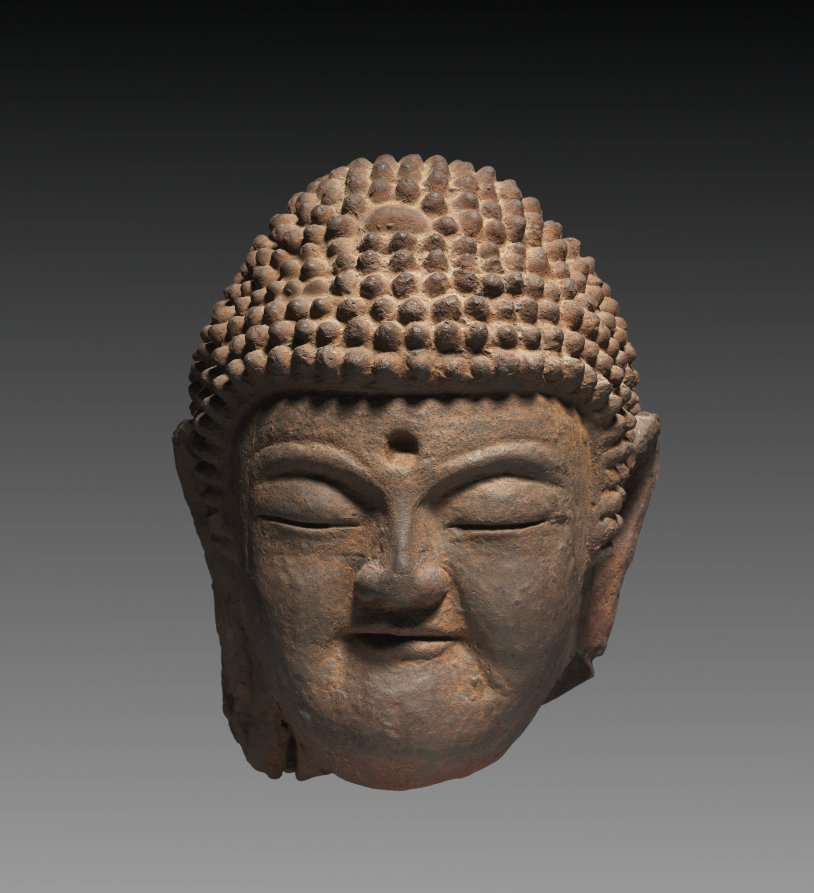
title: Buddha Head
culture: Korea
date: 1900s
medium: cast iron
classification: Sculpture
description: This Buddha has a soft and gentle smile, a typical attribute of Korean images of the Buddha. His plum cheeks and soft smile remind us of his childlike purity while his nearly closed eyes show him in a moment of meditation. The empty divot in the middle of the forehead would originally have contained a jewel symbolizing the light emanating from the Buddha. His head is topped with a profusion of snail-shell curls and an ushnisha, a mound symbolizing the Buddha’s enlightenment.